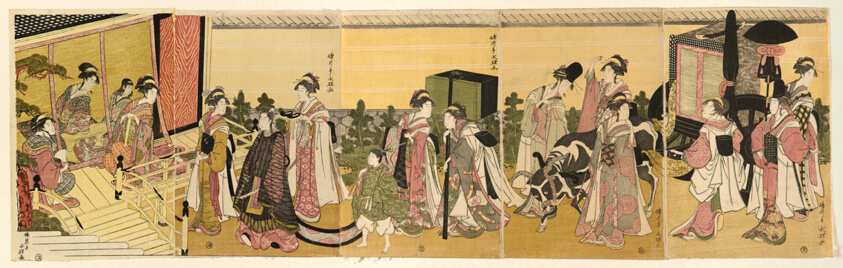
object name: Print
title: Parody of Prince Genji and his procession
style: Japanese (culture or style)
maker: Rekisentei Eiri (Japanese, active c. 1781–1818)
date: c. 1790/1800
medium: Color woodblock print; oban pentaptych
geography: Japan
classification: woodblock print; print; asian art